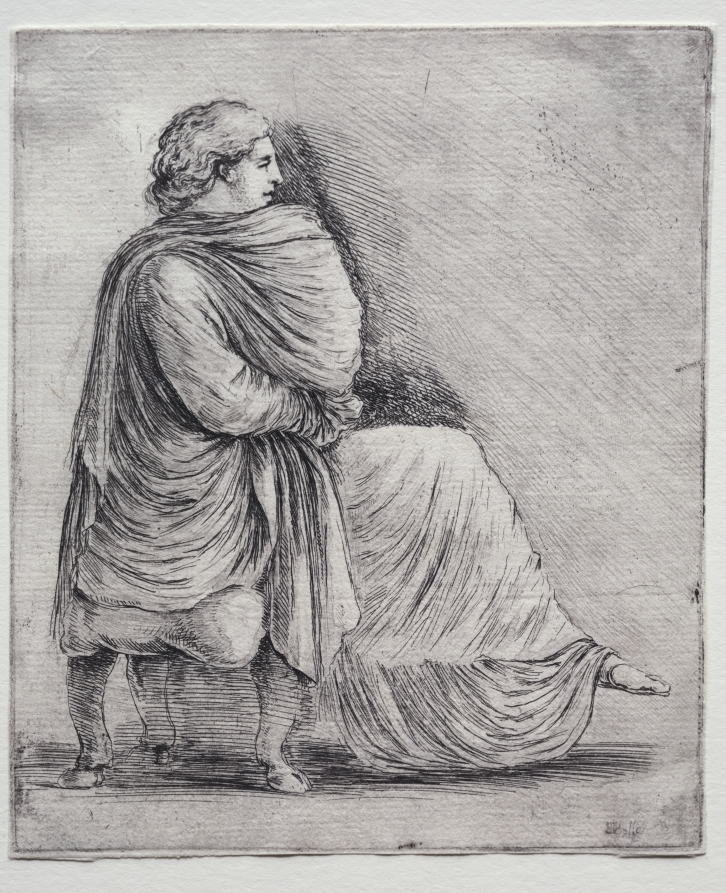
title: Woman Seated on a Stool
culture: Italy, 17th century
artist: Stefano Della Bella (Italian, 1610–1664)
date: c. 1660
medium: etching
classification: Print